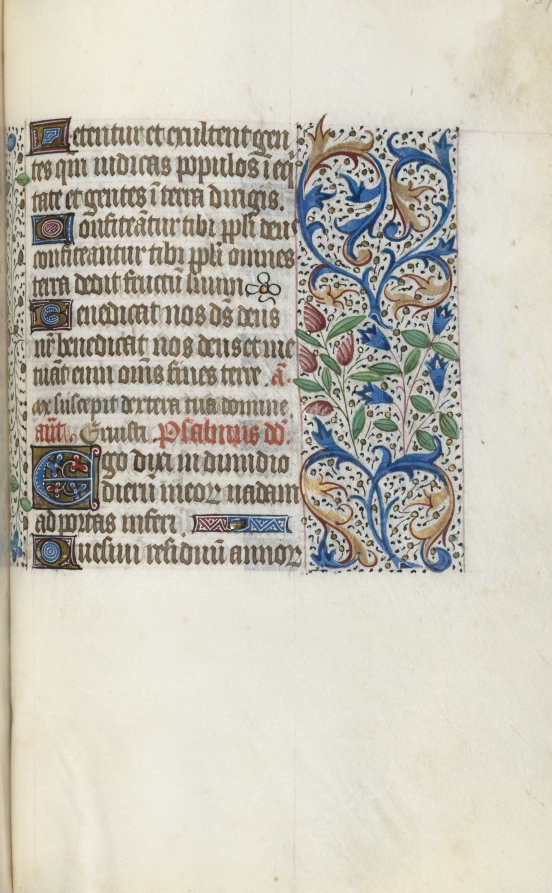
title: Book of Hours (Use of Rouen): fol. 139r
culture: France, Rouen, 15th century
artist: Master of the Geneva Latini (French, active Rouen, 1460–80)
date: c. 1470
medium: ink, tempera, and gold on vellum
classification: Bound Volume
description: In the late 1400s and early 1500s Rouen was an established and important center of book production. The city’s cathedral had a wealthy chapter that spent large sums of money to commission books and to maintain its extensive library. The stationers and booksellers would have likely been concentrated in or near the cathedral precinct. This artist, named after a manuscript now in Geneva, was Rouen’s principal illuminator during the second half of the 1400s.